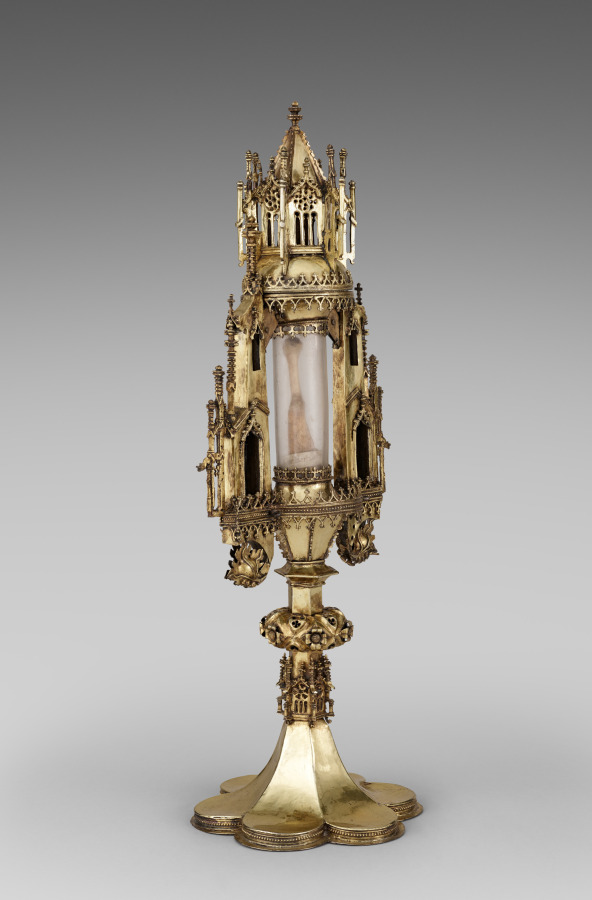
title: Monstrance with a Relic of Saint Sebastian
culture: Germany, Lower Saxony, Brunswick, Gothic period, 15th century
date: 1484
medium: gilded silver, rock crystal, bone, parchment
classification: Metalwork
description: This Late Gothic monstrance (from the Latin monstrare, "to show") is mentioned in the earliest inventory of Saint Blaise as "a large new monstrance containing relics of Saint Sebastian the martyr." Judging from surviving receipts, the reliquary was made by Werner Korff, a local goldsmith, who received payments for silver and gilding at the end of 1484. The reliquary was first displayed on the altar of the church of Saint Blaise in a solemn penitential mass on June 4, 1484, in an effort to ward off the plague. A recent examination revealed that the relic is a human metatarsal bone (one of five long bones of the human foot) and that its owner seemed to have suffered from periostitis, a medical condition that affects the connective tissue surrounding the bone.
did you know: In the Middle Ages, people suffering from diseases might make a journey, or pilgrimage, to venerate relics such as this one. The faithful believed that the remains of saints and holy people like Saint Sebastian could help those seeking aid such as relief from the plague.